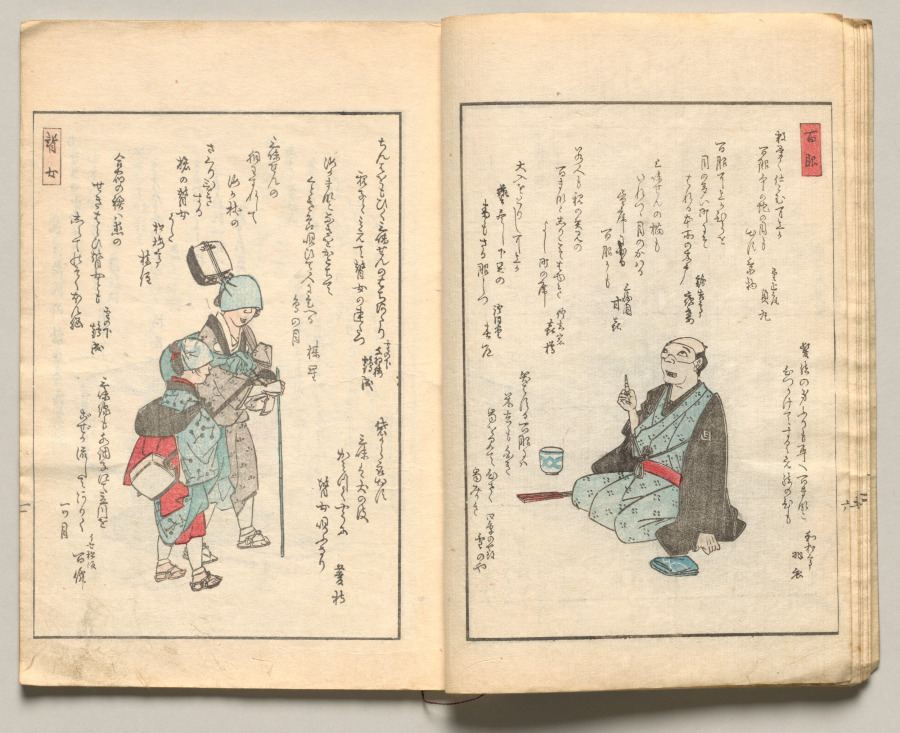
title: Spread Seven from Volume Five of People of Japan in Light Verse (Kyōka)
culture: Japan, Edo period (1615–1868)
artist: Utagawa Hiroshige (Japanese, 1797–1858)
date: 1857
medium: Woodblock-printed book; ink and color on paper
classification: Bound Volume